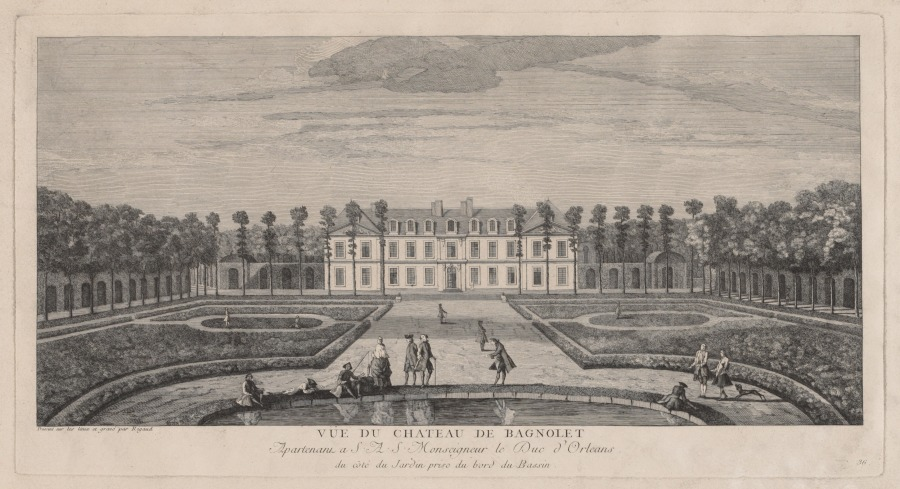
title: Chateau of Bagnolet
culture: France, 18th century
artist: Jacques Rigaud (French, 1681–1754)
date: c. 1720–50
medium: engraving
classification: Print